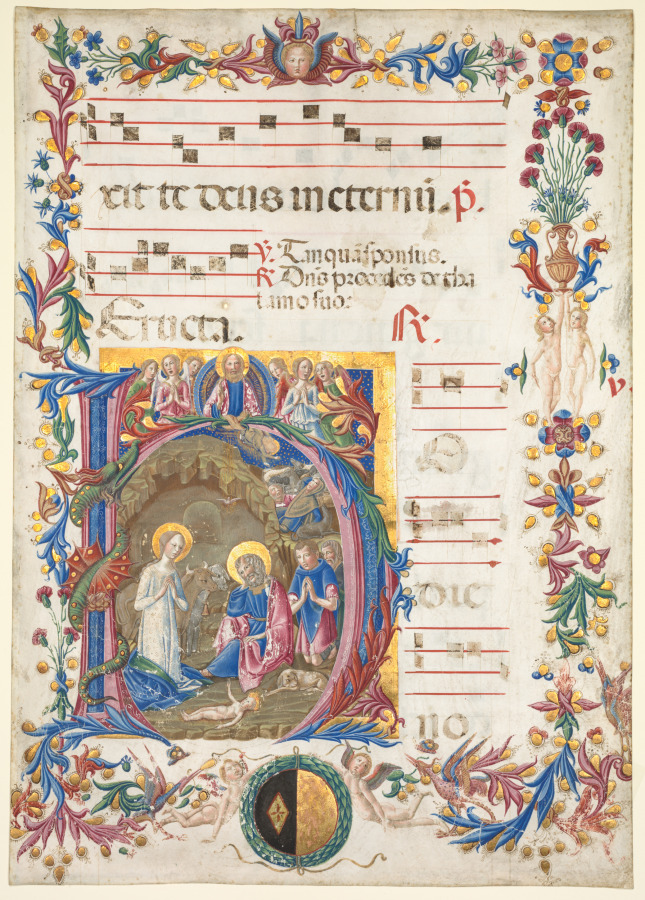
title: Single Leaf from an Antiphonary: Initial H[odie nobis] with The Nativity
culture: Italy, Siena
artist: Benvenuto di Giovanni (Italian, 1436–1509/17)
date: 1471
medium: ink, tempera, and gold on parchment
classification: Manuscript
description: This initial h introduces the first matins response for Christmas Day: Hodie nobis celorum rex (“On this day the King of Heaven”). Illustrating this artist’s love of fantastic detail, an entwined dragon climbs the ascender of the h. Christ’s nativity is within the letter, complete with adoring shepherds. Above is the figure of Christ blessing, surrounded by singing angels intended to suggest the heavenly realm. Benvenuto is first recorded in 1453, when he is known to have been working on the frescoes in the Siena Baptistery. This leaf comes from a set of choir books commissioned for Siena’s Hospital of Santa Maria della Scala by Niccolò Ricoveri, the hospital’s rector, as indicated by the coat of arms at the bottom of the leaf.